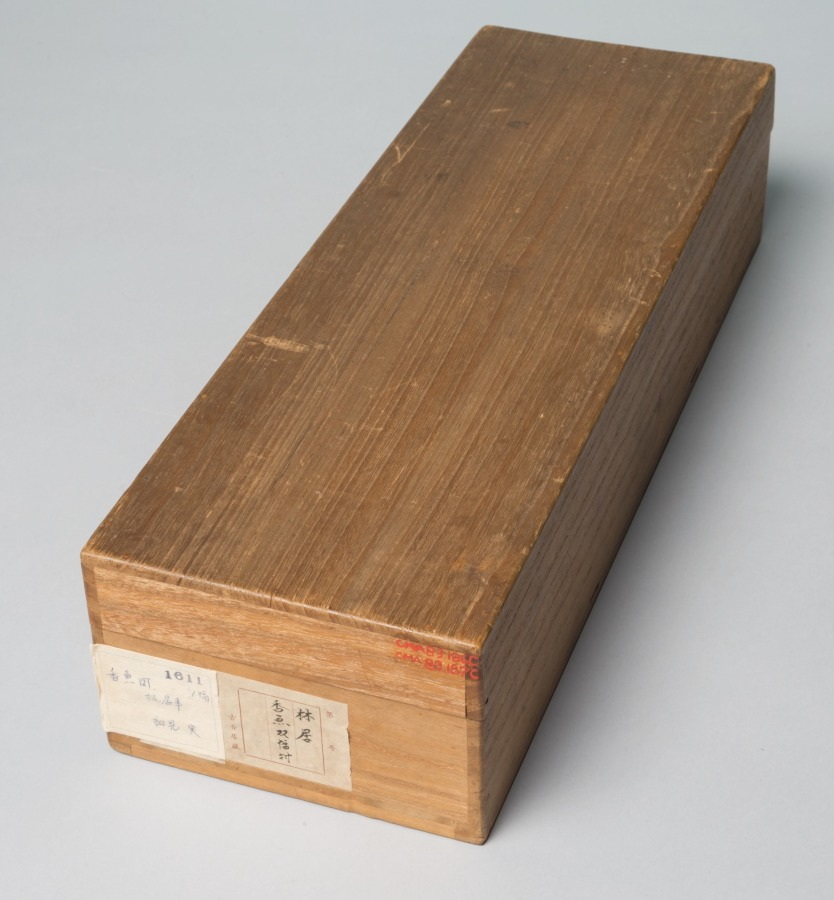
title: Fish and Rock; Fish and Seaweed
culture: Japan, Momoyama period (1573–1615)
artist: Rinkyo (Japanese)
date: 1573–1615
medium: pair of hanging scrolls; ink on paper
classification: Painting